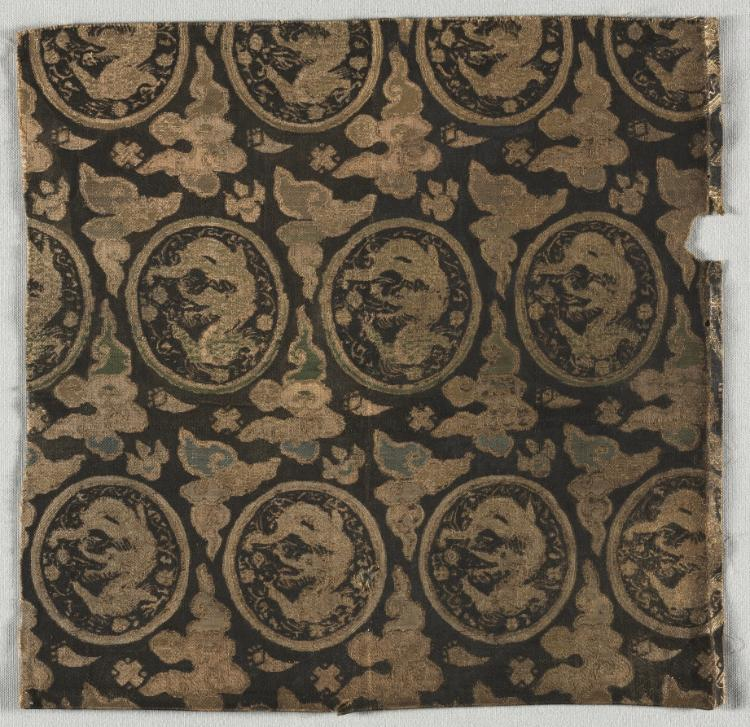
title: Silk Textile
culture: Japan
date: 1700s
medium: silk, metallic thread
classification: Textile